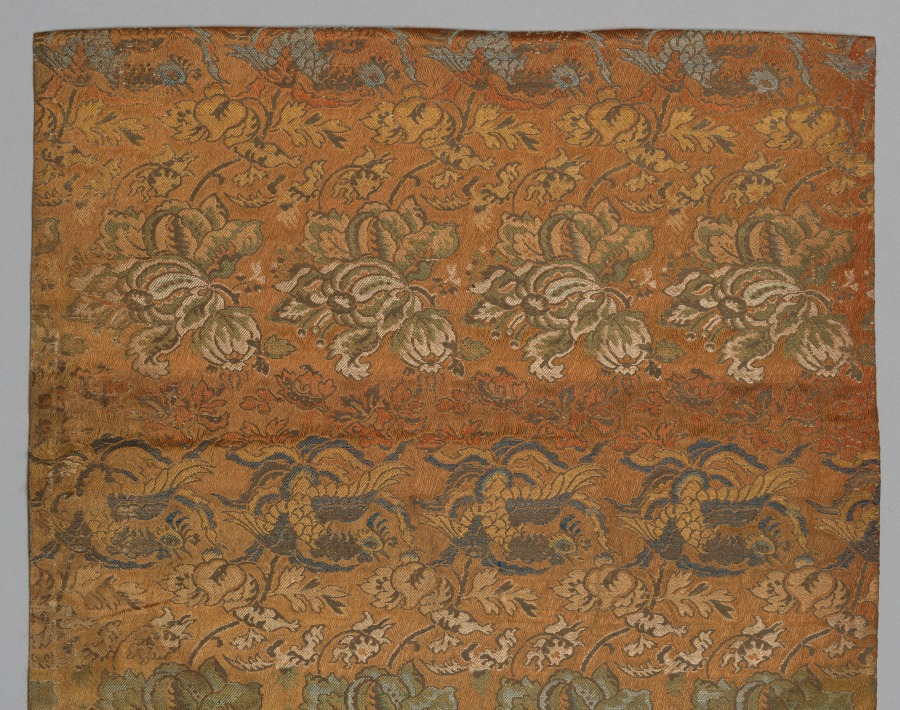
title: Silk Textile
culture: Japan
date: 19th century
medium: silk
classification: Textile